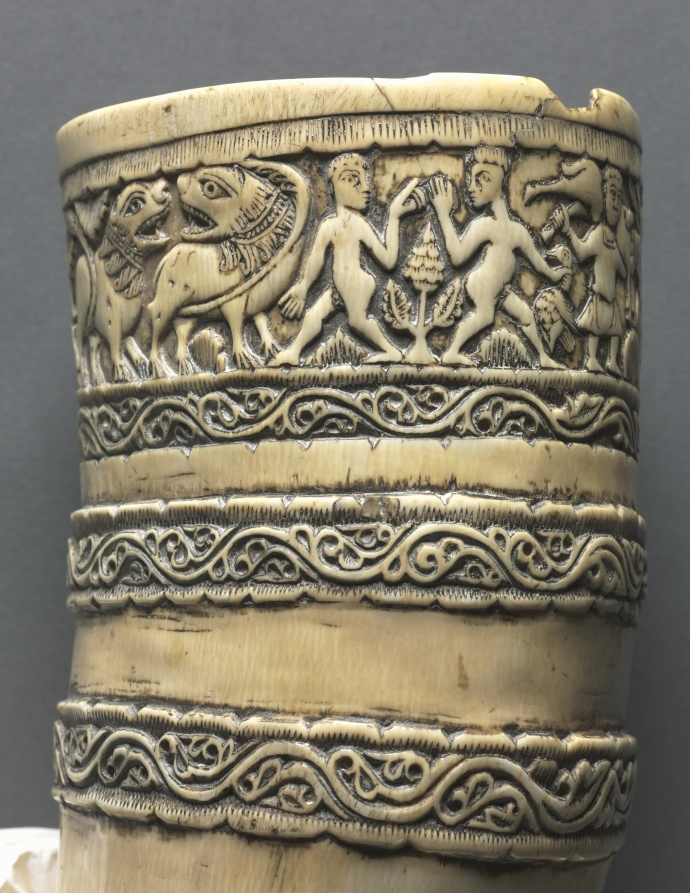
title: The So-called Horn of Saint Blaise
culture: South Italy or Sicily, 12th century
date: 1100–1200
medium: ivory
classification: Ivory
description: This oliphant--a carved elephant tusk in the shape of a hunting horn--was likely carved in an Arab ivory workshop in South Italy or Sicily. It is masterfully shaped, with a series of six carved bands, the outer ring depicting scenes from a hunt. The earliest surviving inventory of the church of Saint Blaise from 1482-85 lists an oliphant decorated with silver rings and precious stones and known as the "Horn of Saint Blaise." By the 17th century, Saint Blaise was reputed to have used this very horn to summon the faithful to worship.